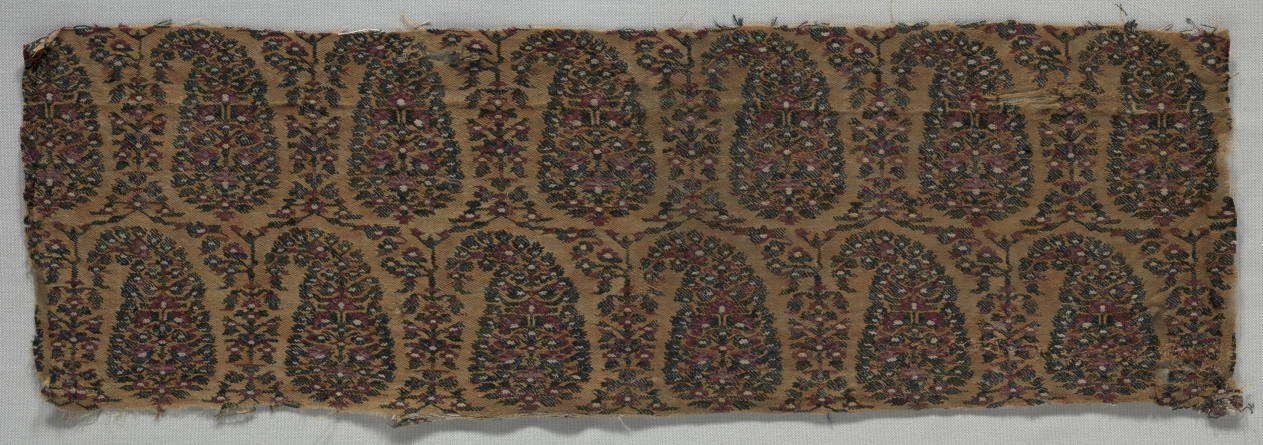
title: Fragment of a Shawl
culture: India, Kashmir, 19th century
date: 1800s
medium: tapestry weave: wool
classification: Textile